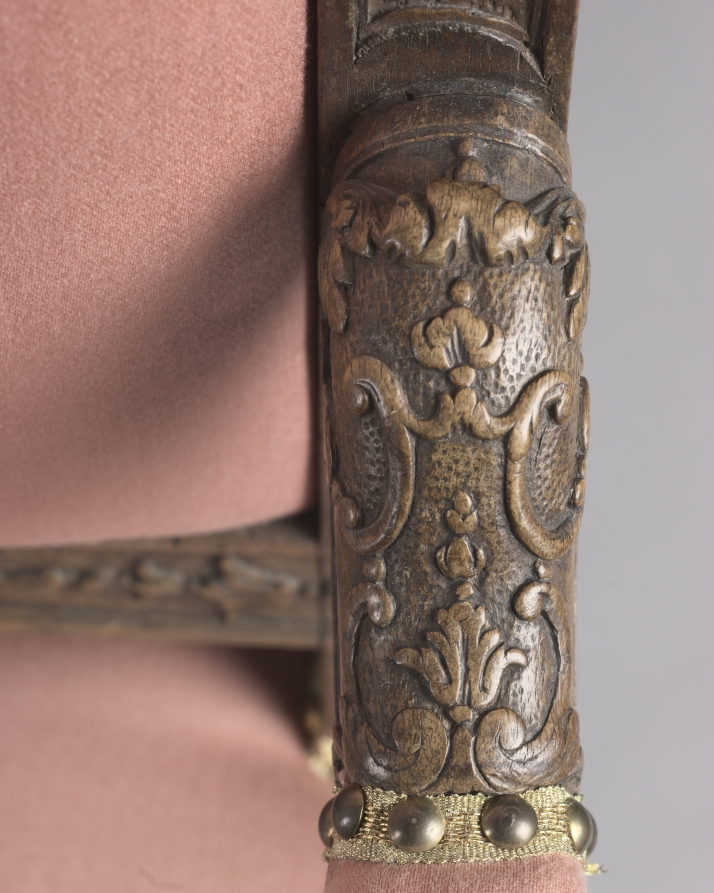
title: Armchair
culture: France, 18th century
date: c. 1715–1723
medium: oak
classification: Furniture and woodwork